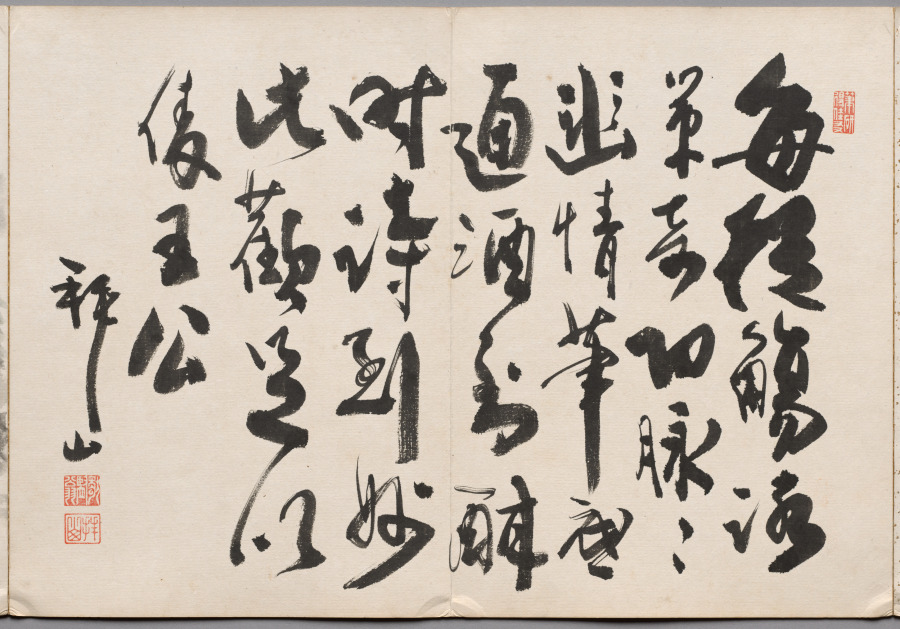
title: Preface from Album of Paintings by Haizan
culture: Japan, Meiji period (1868–1912) or Taishō period (1912–26)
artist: Yoshitsugu Haizan (Japanese, 1846–1915)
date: late 1800s–early 1900s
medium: page spread from double-sided accordion album; ink and color on paper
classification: Painting